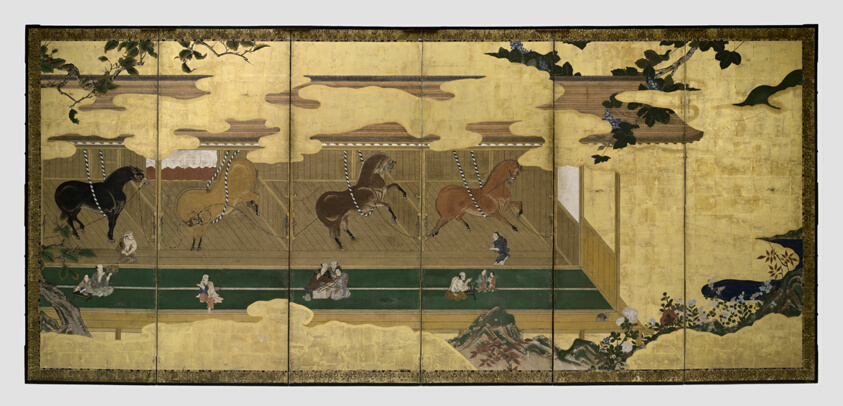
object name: Painting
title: Horses in Stables (Umaya-zu byobu)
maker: Unknown artist (Japanese)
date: c. 1688–1704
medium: Pair of six panel screens; ink, colors and gold leaf on paper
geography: Japan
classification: painting